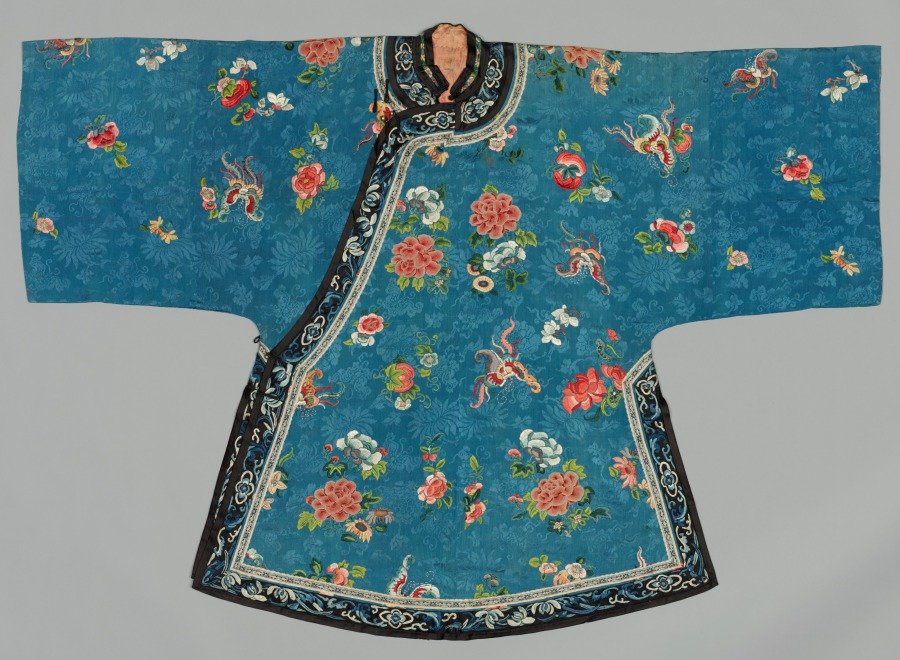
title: Han Woman's Jacket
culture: China, Qing dynasty (1644–1911)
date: 1880s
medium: Silk: embroidery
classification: Garment